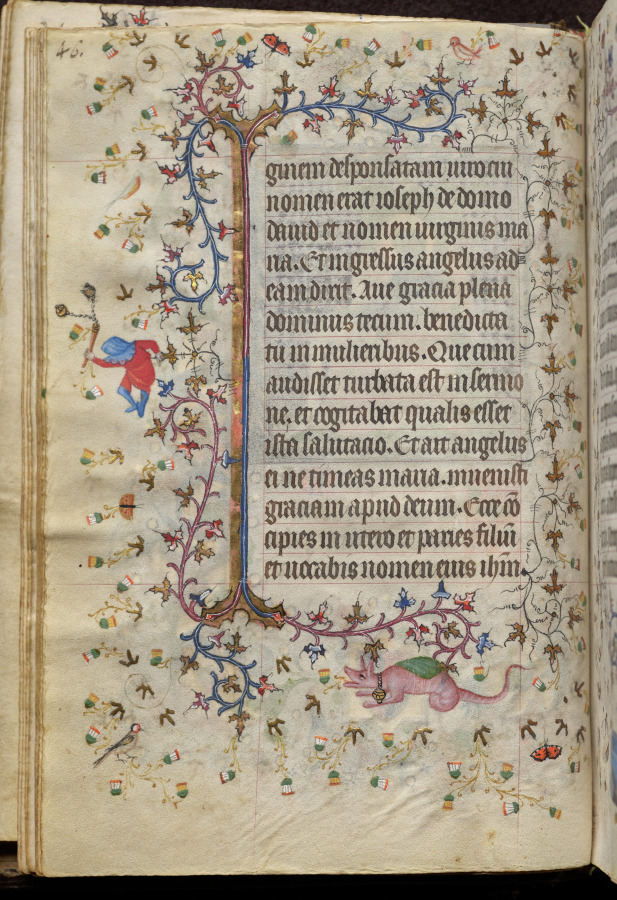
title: Hours of Charles the Noble, King of Navarre (1361-1425): fol. 23v, Text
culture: France, Paris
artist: Master of the Brussels Initials and Associates (French)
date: c. 1405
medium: ink, tempera, and gold on vellum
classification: Bound Volume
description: This precious volume was obviously highly prized by its owner, the French-born King of Navarre, who had his coat of arms painted on no less than twenty folios. Rather than directly commissioning this manuscript from a specific workshop, it seems that Charles the Noble acquired his book of hours -- perhaps ready-made for the luxury market -- while on a trip to Paris in 1404-05. A collaborative effort, six painting styles are evidenced within the pages of this codex, those of two Italians, two Frenchmen, and two Netherlanders. The painter who was responsible for the planning and decoration of the book, and who produced seventeen of the large miniatures, was a Bolognese artist known as the Master of the Brussels Initials. His principal assistant, responsible for most of the borders, was a Florentine who signed his name "Zecho" da Firenze on folio 208 verso.